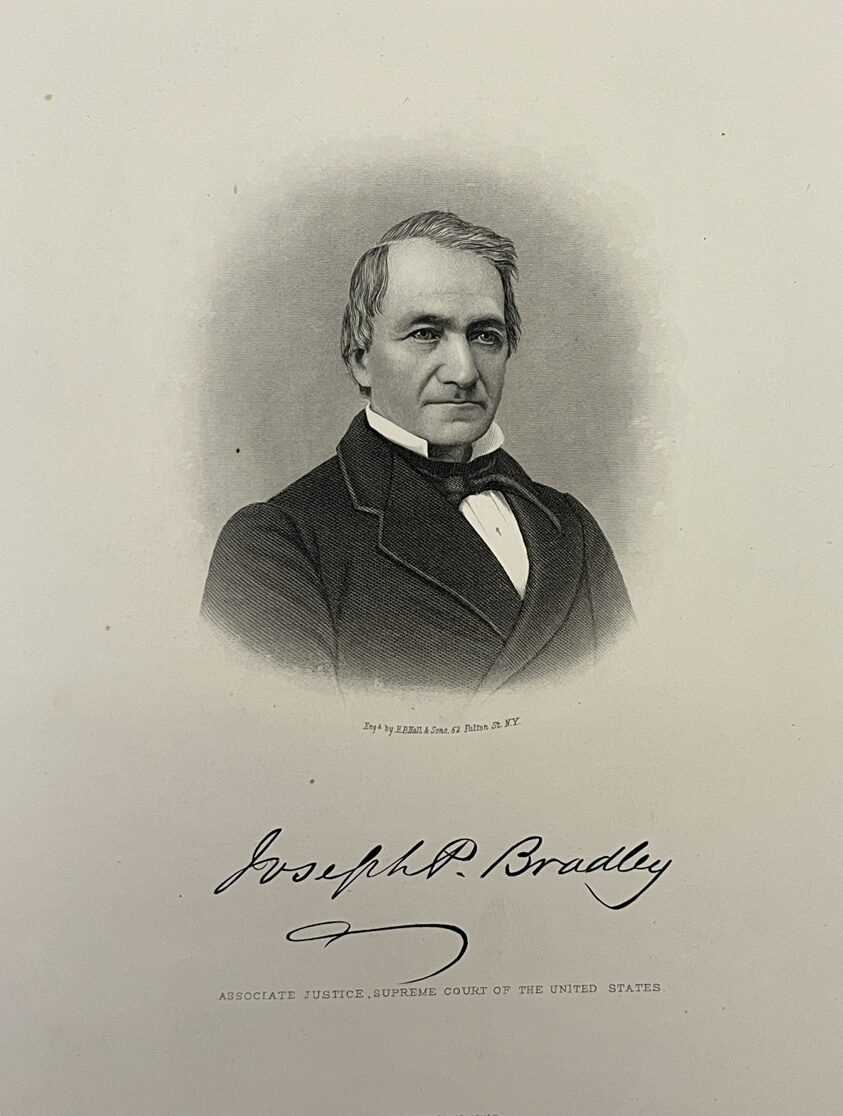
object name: Print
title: Joseph P. Bradley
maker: Henry Bryan Hall (American, 1808-1884); published by W.H. Barnes (American, 19th century)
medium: Stipple and line engraving on paper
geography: United States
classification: reproduction; print; prints and drawing